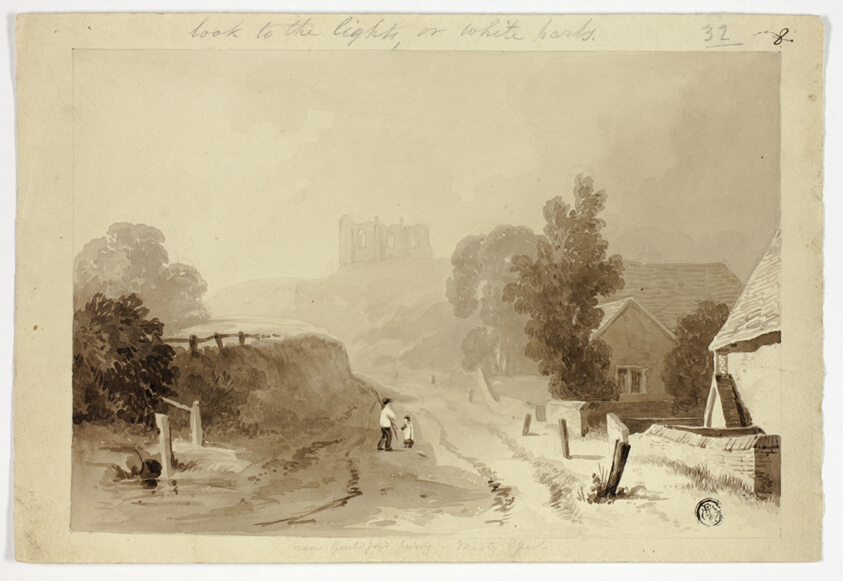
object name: Drawing and Watercolor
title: Saint Catherine's Hill, Guildford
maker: Thomas Girtin (English, 1775-1802)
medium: Brush and brown wash, over graphite, on cream wove paper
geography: England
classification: ink or chalk wash; drawings (visual works); prints and drawing